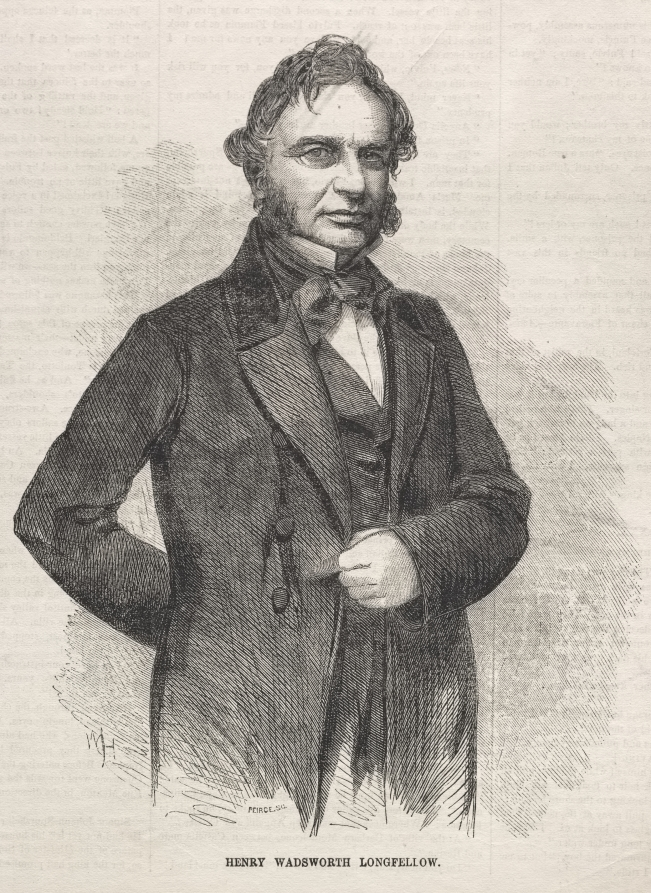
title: Henry Wadsworth Longfellow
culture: America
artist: Winslow Homer (American, 1836–1910)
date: 1858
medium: wood engraving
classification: Print